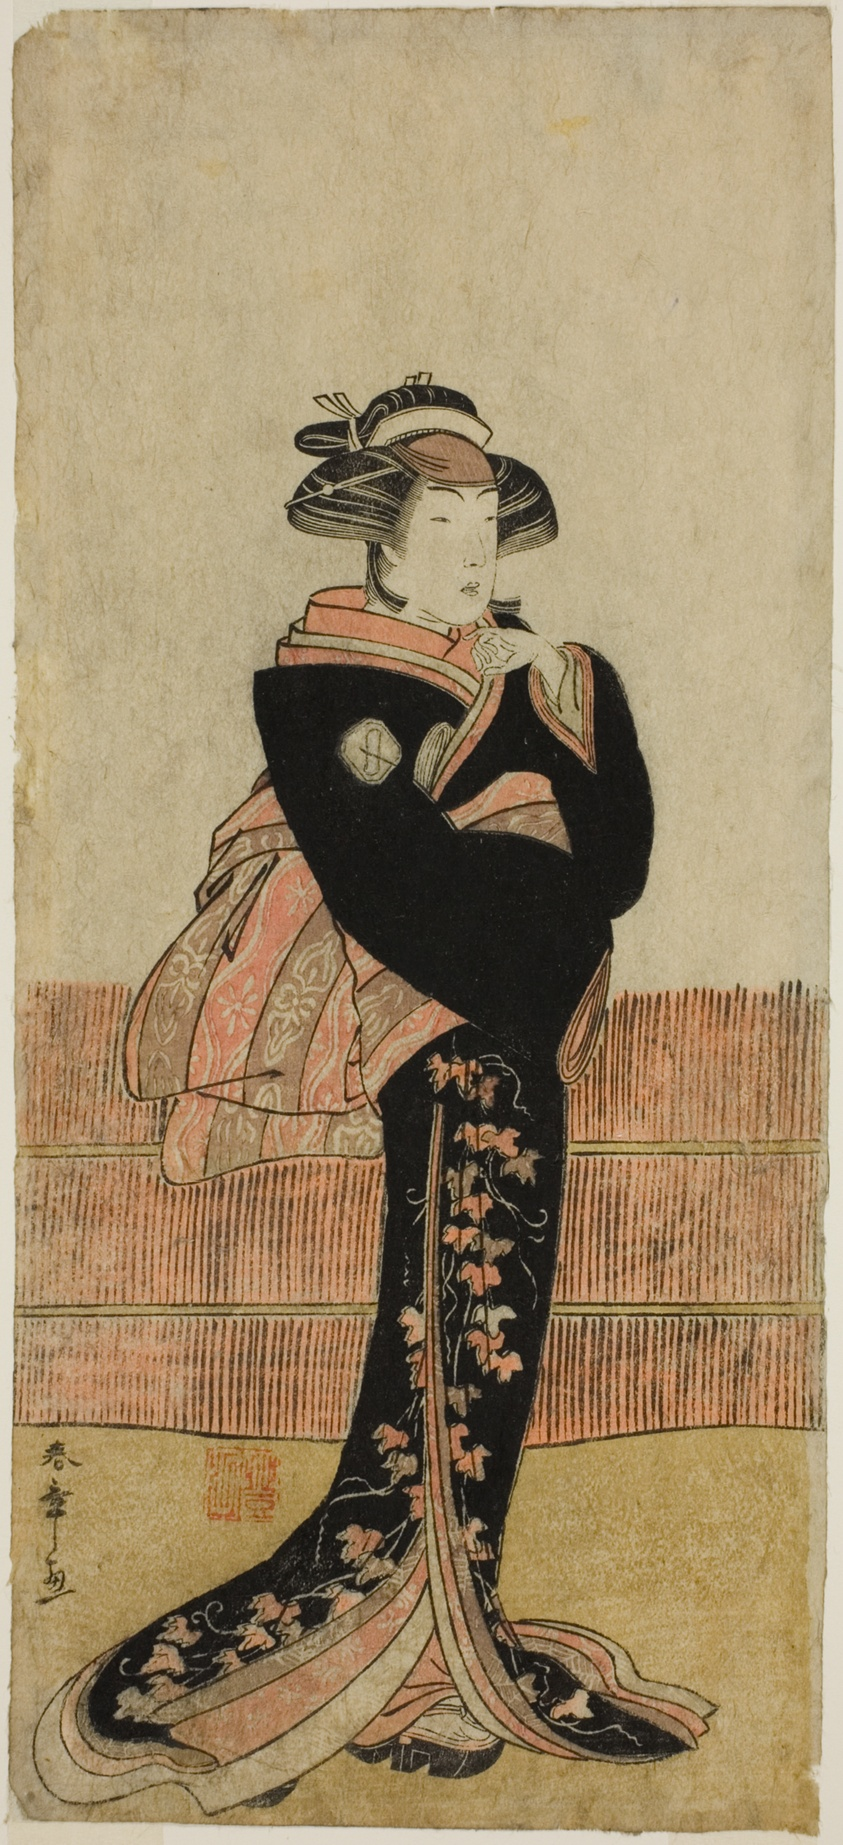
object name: Print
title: The Actor Azuma Tozo III in an Unidentified Role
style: Japanese (culture or style)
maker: Katsukawa Shunsho 勝川 春章; Japanese, 1726-1792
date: early 1780s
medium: Color woodblock print; hosoban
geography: Japan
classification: woodblock print; print; asian art